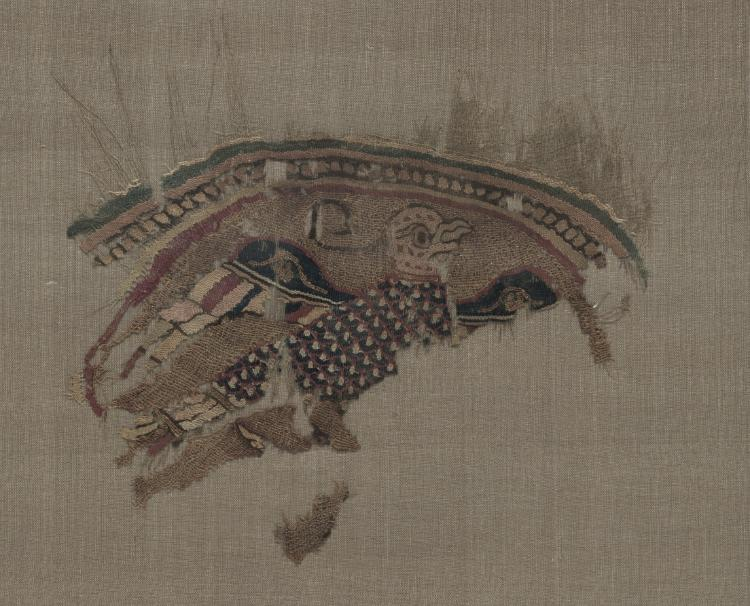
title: Fragmentary roundel with eagle in gold ground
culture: Egypt, Fatimid period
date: 1000s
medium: linen, silk, and gold filé: plain weave with inwoven tapestry weave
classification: Textile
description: This plain weave fragment contains an ornamental bird with outstretched wings encircled by a pearled frame.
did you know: The gold threads were not beaten up and therefore form loose, open weave in contrast to rest of the silk tapestry.